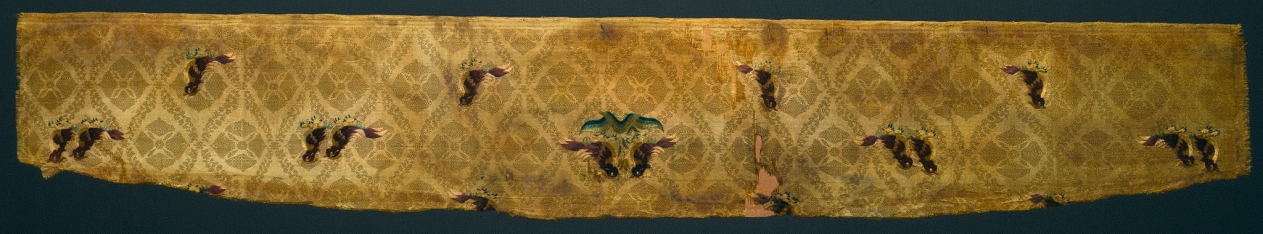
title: Embroidery with Birds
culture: China, Tang dynasty (618-906)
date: 700s-800s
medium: embroidery, silk thread on silk ground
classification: Embroidery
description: These engaging little birds are embroidered in a naturalistic style that developed during the 8th and 9th centuries. All but one are oriented away from the central pair that flanks a tulip growing from a hill. Contrasting with the spontaneity of the birds is the structured pattern of the silk ground—rosettes within a lozenge grid. Such contrasts frequently occur among embroideries of the Tang dynasty. Also characteristic of embroideries from that period is the use of discrete areas of color with no attempts at shading. The form of the birds, the hill, and the flower are based on Persian models. The introduction of foreign motifs into the decorative arts of Central Asia and China was one of the most important results of active trading in precious objects along the Silk Road.